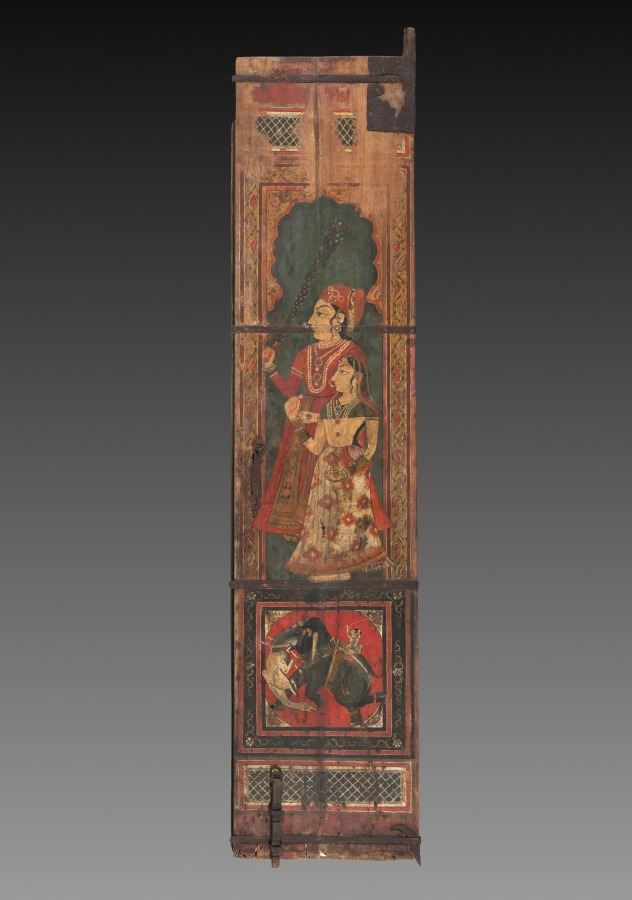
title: Painted Door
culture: Northwestern India, Rajasthan, possibly Rajput kingdom of Bundi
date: c. 1820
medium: color on wood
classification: Painting